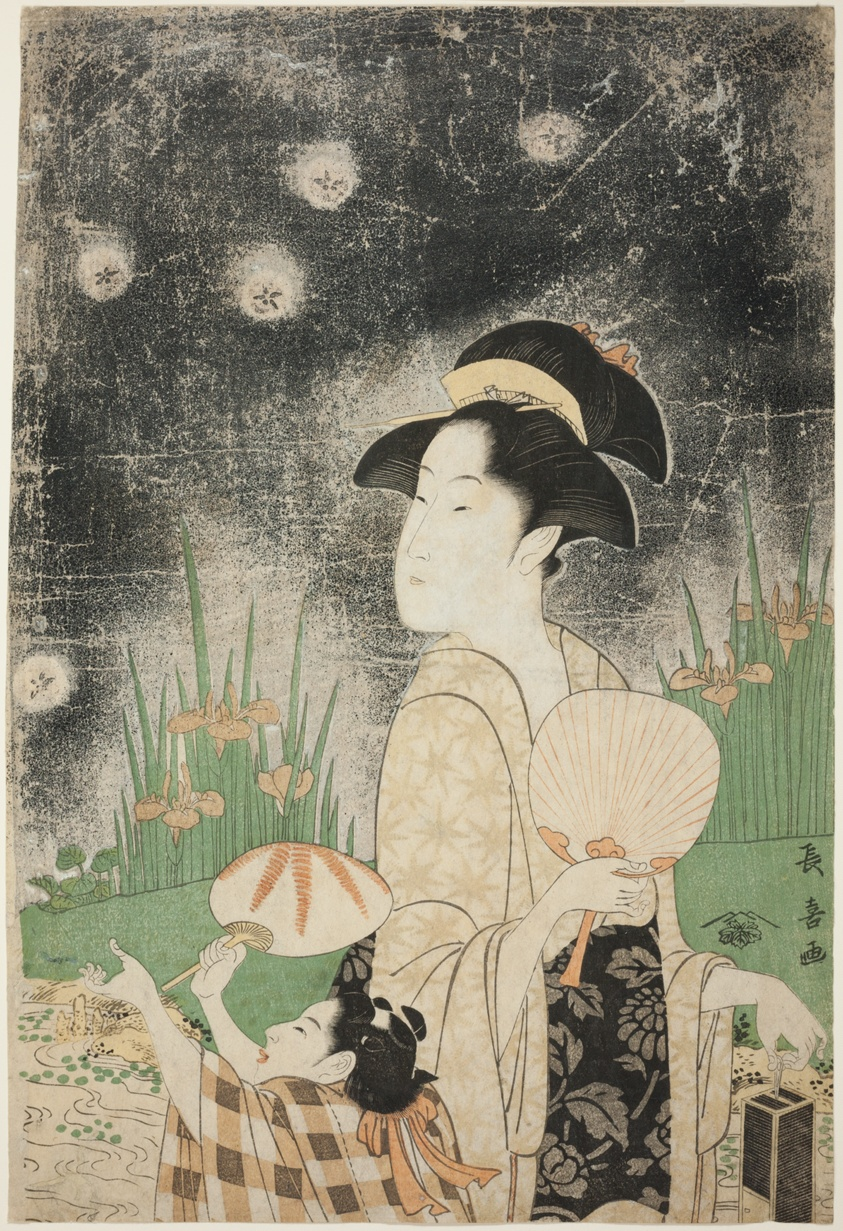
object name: Print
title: Catching Fireflies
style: Japanese (culture or style)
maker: Eshōsai Chōki; Japanese, active c.1780–1810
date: c.1790s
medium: Color woodblock print; ōban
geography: Japan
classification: woodblock print; print; asian art